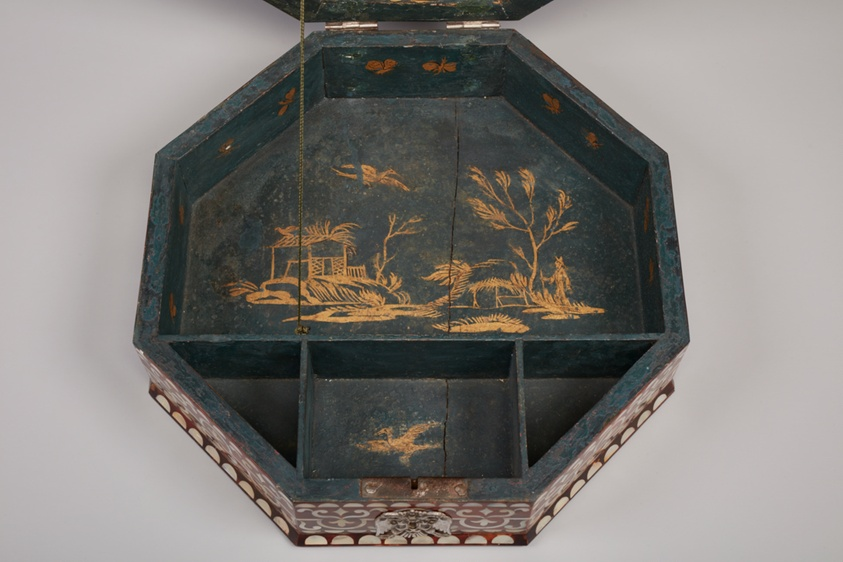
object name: Decorative Arts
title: Coffer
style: 18th Century, Baroque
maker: Peruvian; Probably Lima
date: c. 1750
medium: Wood, tortoiseshell, mother-of-pearl, silver, glass, and paint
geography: Lima department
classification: box; inlay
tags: box, coffer